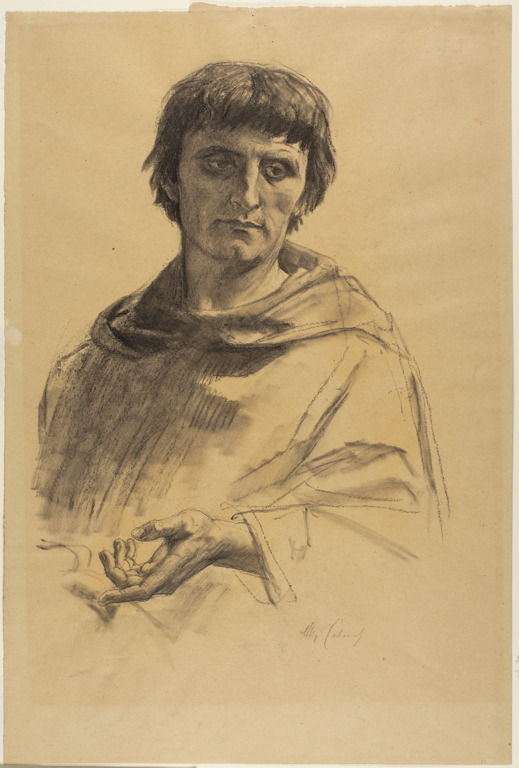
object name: Drawing and Watercolor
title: Central Figure, study for The Life of Saint Louis, King of France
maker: Alexandre Cabanel (French, 1823-1889)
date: c. 1878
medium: Charcoal, with stumping, on tan wove paper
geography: France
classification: charcoal; drawings (visual works); prints and drawing